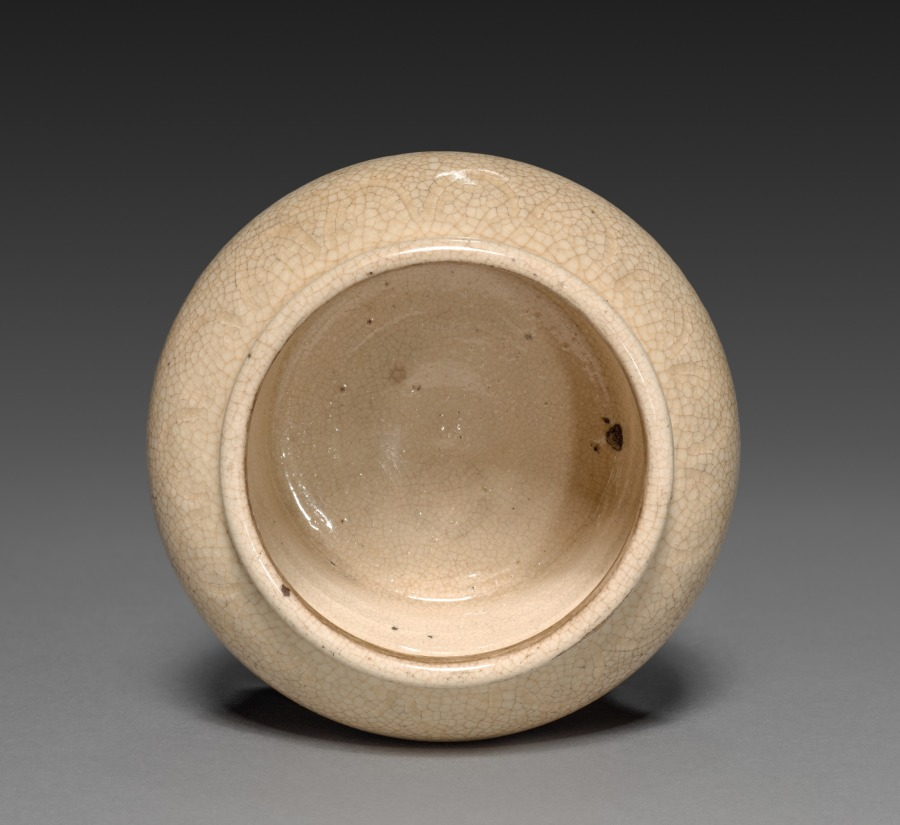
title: Jar (Satsuma ware)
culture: Japan, Meiji period (1868–1912)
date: 1868–1912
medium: pottery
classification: Ceramic